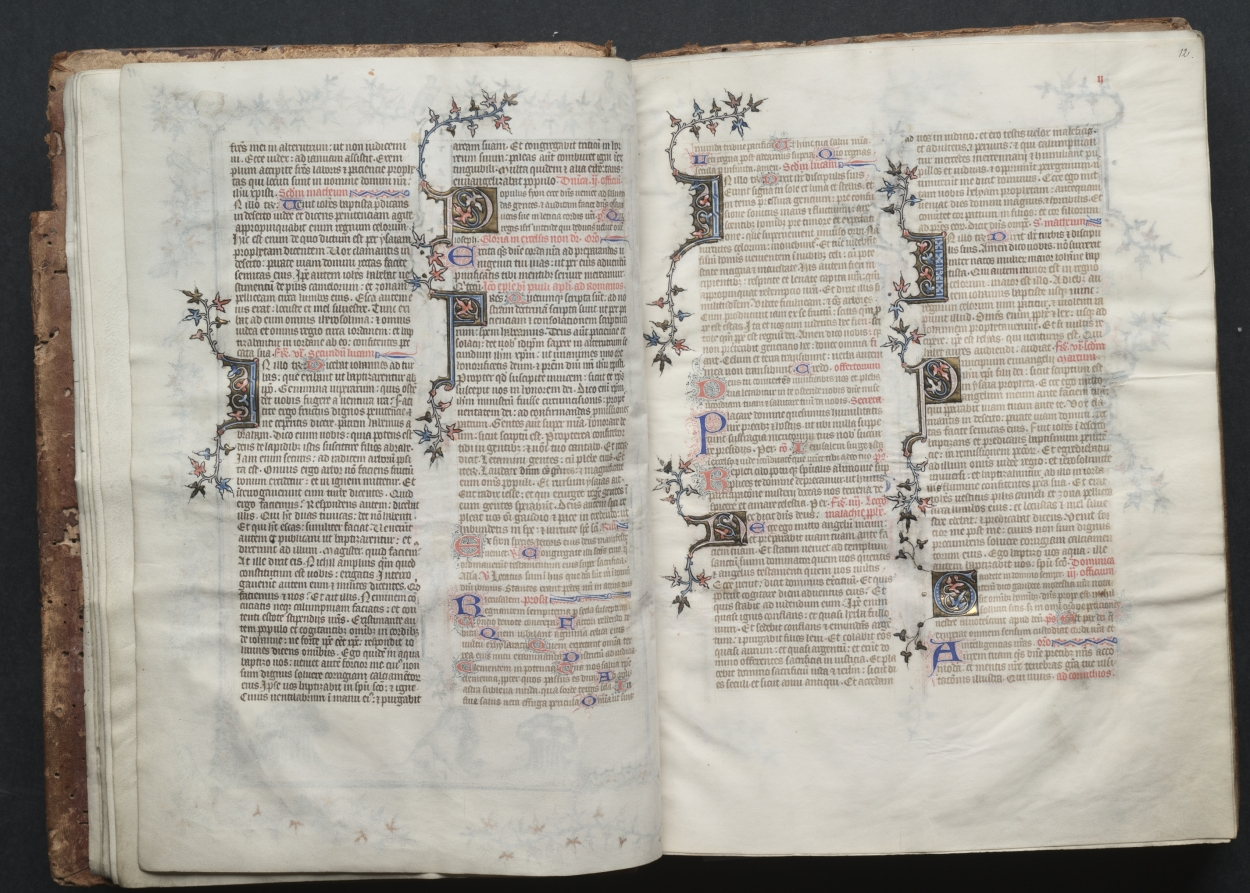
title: The Gotha Missal: Fol. 11v, Text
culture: France, Paris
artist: Master of the Boqueteaux (French)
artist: and Workshop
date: c. 1375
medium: ink, tempera, and gold on vellum; blind-tooled leather binding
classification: Bound Volume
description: The style and quality of this manuscript's decoration is typical of deluxe Parisian books made for aristocratic or royal patrons. Most of the book's decoration appears to be the work of the Master of the Boqueteaux, an artist active at the court of King Charles V (died 1380). His style was apparently shared by a number of book illuminators working in and around Paris. It is very possible that the Gotha Missal belonged to Charles V, but is not provable because the manuscript has no royal portraits and lacks a colophon. Given the book's magnificent decoration, however, it would seem that it was produced for a Valois prince, if not for the king himself. The manuscript receives its name from the German dukes of Gotha, its later owners.